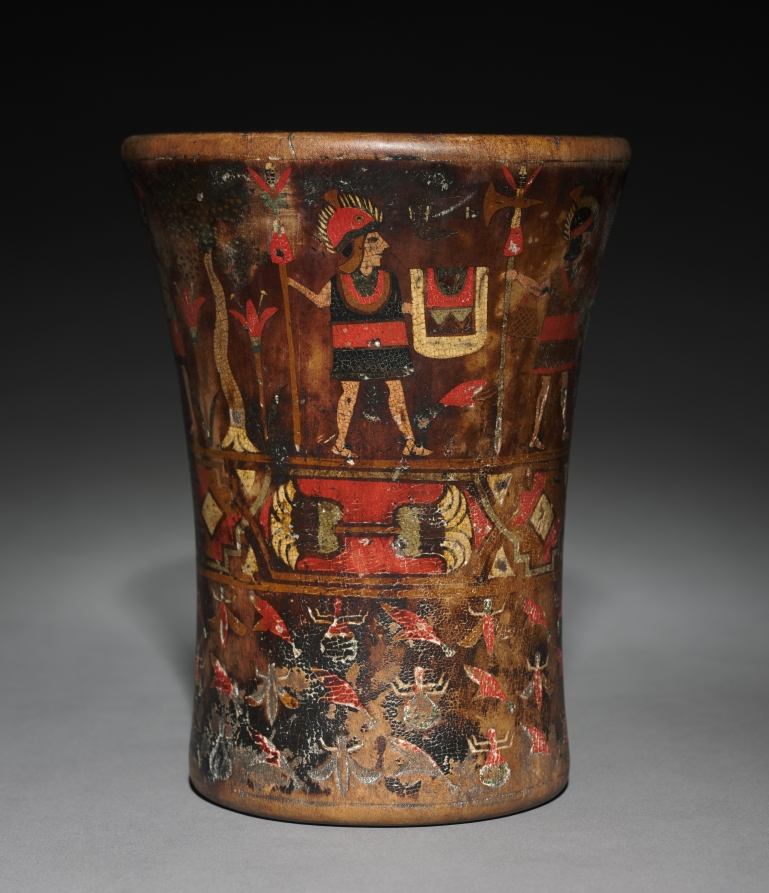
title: Kero (Waisted Cup)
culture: Peru, Colonial Inka style, 16th century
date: after 1550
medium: wood, inlaid pigments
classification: Wood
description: Keros, used to drink the maize beer chicha, were essential items of Inka statecraft. Made and used in pairs, they reflect the important Andean concept of reciprocity. Native use of keros continued in the colonial period, the date of these two examples, which come from separate pairs. The example with geometric motifs is closest to pre-conquest models. On the second, two armies converge: the Inka, dressed in tunics with waistbands, and their opponents, perhaps jungle people whose body parts are heaped in a centerpiece.